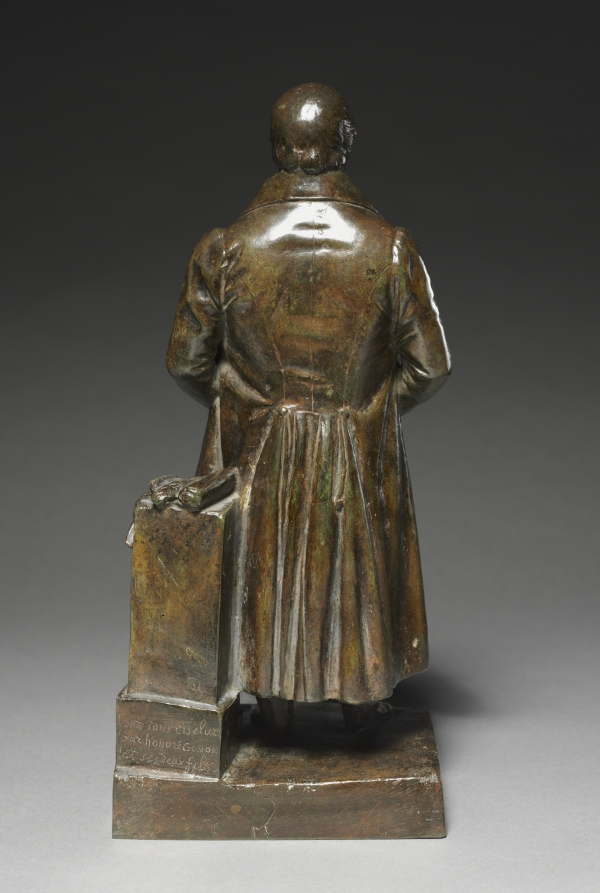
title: Portrait of Jean-Pierre-Joseph Darcet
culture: France, 19th century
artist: James Pradier (Swiss, 1790–1852)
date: 1834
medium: bronze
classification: Sculpture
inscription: signed an dated: "J. Pradier/ 1834"